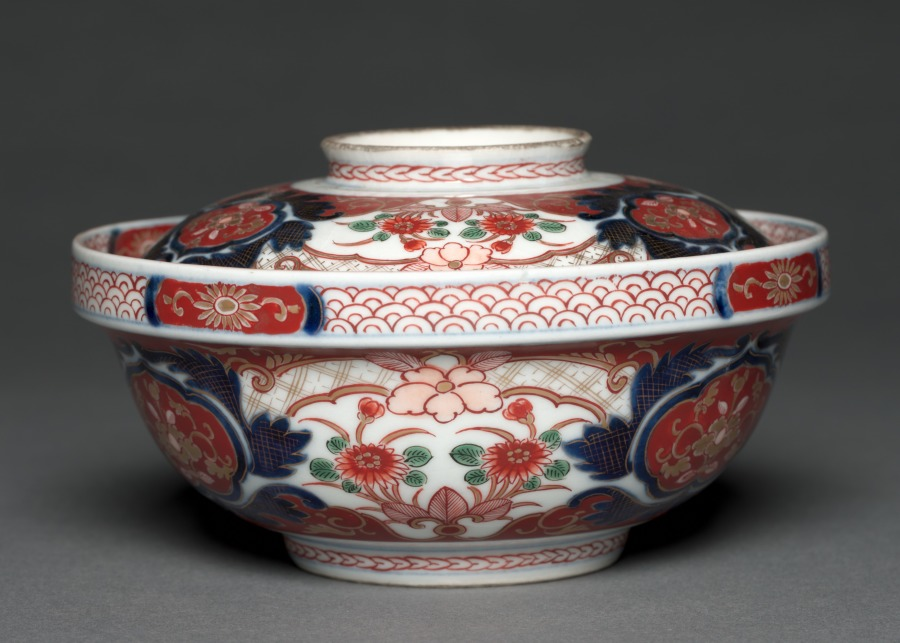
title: Covered Bowl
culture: Japan, Edo period (1615–1868)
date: early to mid-1800s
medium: white porcelain with underglaze blue, overglaze enamel and gold decoration (Hizen ware, Arita type)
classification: Ceramic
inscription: four characters in blue circle on base, translate as: "Wealth Long Spring."